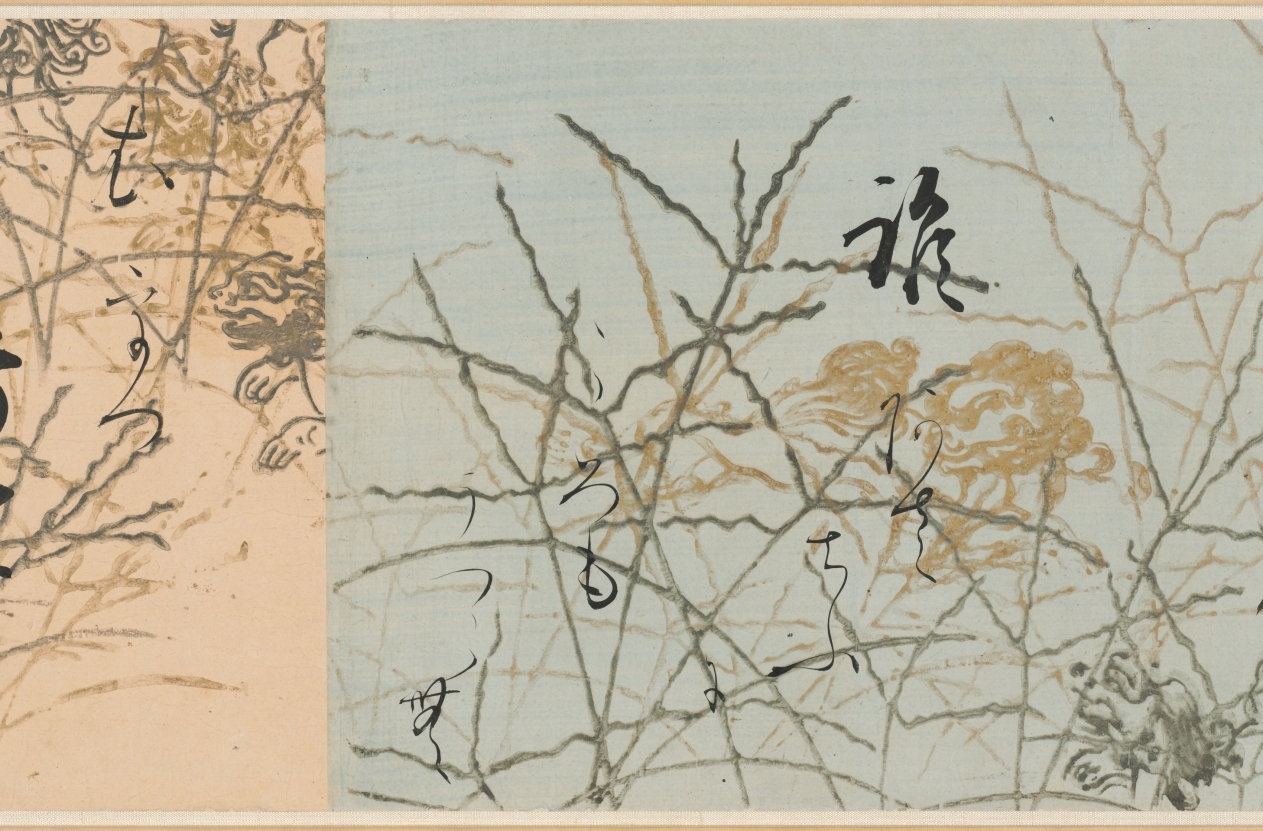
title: Selections from the New Collection of Japanese Poems from Ancient and Modern Times (Shinkokin wakashū) with Printed Designs of Chinese Lions and Crab Finger Grass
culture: Japan, Edo period (1615–1868)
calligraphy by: Hon'ami Kōetsu (Japanese, 1558–1637)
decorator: Tawaraya Sōtatsu (Japanese, c. 1570–c. 1640)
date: early 1600s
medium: handscroll; ink, gold, and silver on paper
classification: Calligraphy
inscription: Seal: 光悦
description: Hon’ami Kōetsu was a calligrapher and craftsman who frequently collaborated with the painter Tawaraya Sōtatsu, considered the first master of the Rinpa school. Kōetsu brushed seven poems from the autumn section of a poetry anthology onto dyed paper with motifs designed and printed in gold and silver by Sōtatsu.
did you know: Before becoming a master painter of screens, Tawaraya Sōtatsu painted fans.